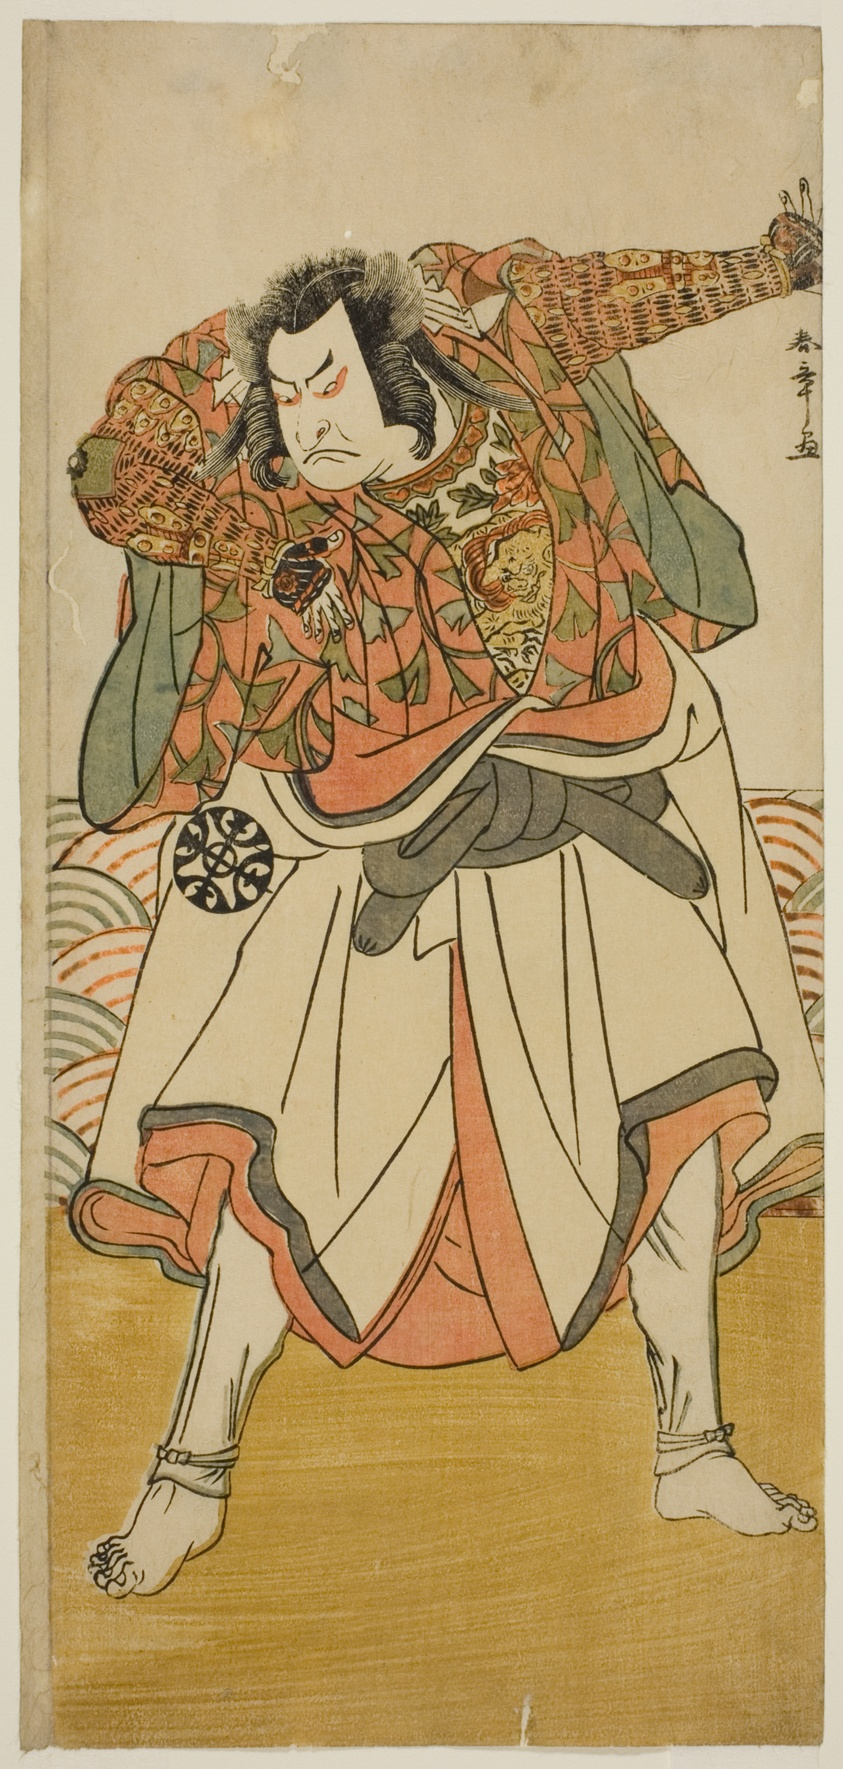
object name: Print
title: The Actor Nakamura Nakazo I as Chinzei Hachiro Tametomo Disguised as an Ascetic Monk, in the Play Kitekaeru Nishiki no Wakayaka, Performed at the Nakamura Theater in the Eleventh Month, 1780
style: Japanese (culture or style)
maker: Katsukawa Shunsho 勝川 春章; Japanese, 1726-1792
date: c. 1780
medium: Color woodblock print; hosoban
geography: Japan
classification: woodblock print; print; asian art